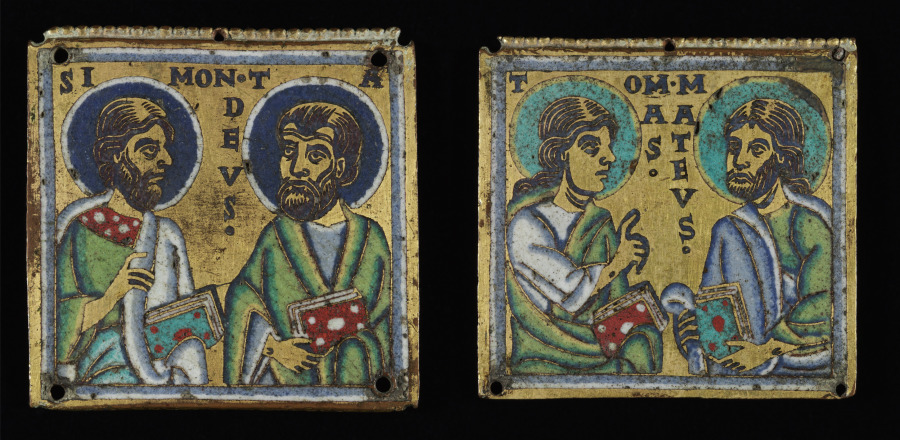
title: Plaque Pair: Simon and Thaddaeus and Thomas and Matthew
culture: Mosan, Valley of the Meuse, Romanesque period, 12th century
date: c. 1160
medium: gilded copper, champlevé enamel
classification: Enamel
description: It is likely this pair of enamel plaques depicting the apostles Simon with Thaddeus and Thomas with Matthew once formed part of the decoration of a portable altar, a reliquary triptych, or some other kind of liturgical object.